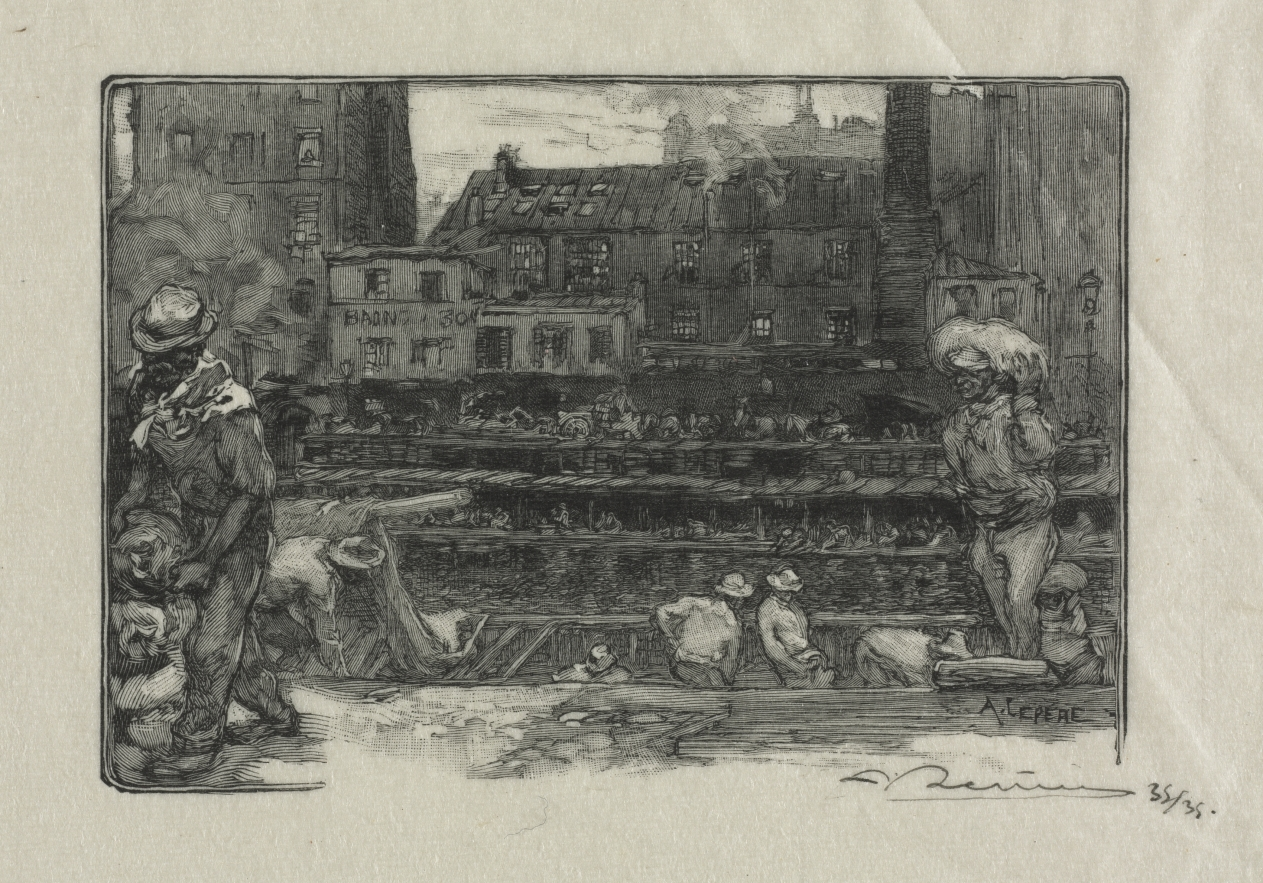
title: Unloaders of Plaster (Canal St. Martin)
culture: France, 19th century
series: La Revue Illustrée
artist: Auguste Louis Lepère (French, 1849–1918)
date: 1890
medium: wood engraving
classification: Print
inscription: lower right, in black ink: A. Lepere 35/35